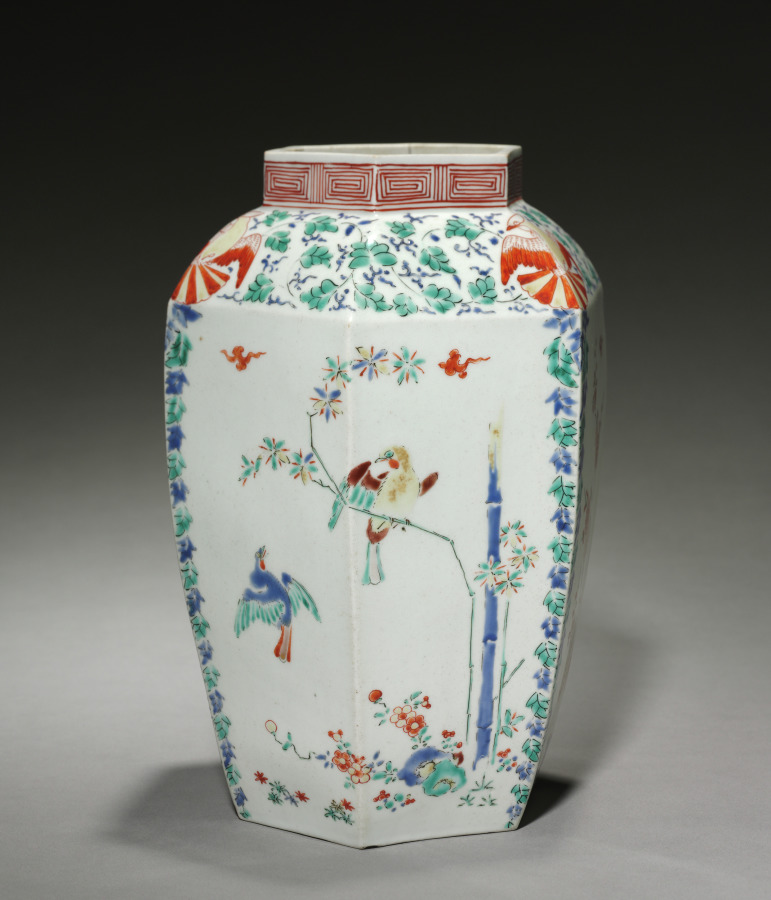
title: Hexagonal Jar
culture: Japan, Edo period (1615–1868)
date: late 1600s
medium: porcelain with overglaze enamel and gold decoration (Hizen ware, Kakiemon type)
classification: Ceramic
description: This pair of jars originally possessed domed lids. Their imposing size, shape, and Chinese-style décor identify them as products made for the European markets in England, Holland, France, and Germany. Indeed many similar examples can be seen in museum and historic house collections in those countries. Such Kakiemon ware also inspired domestic porcelain production in Europe in the 18th and 19th centuries.